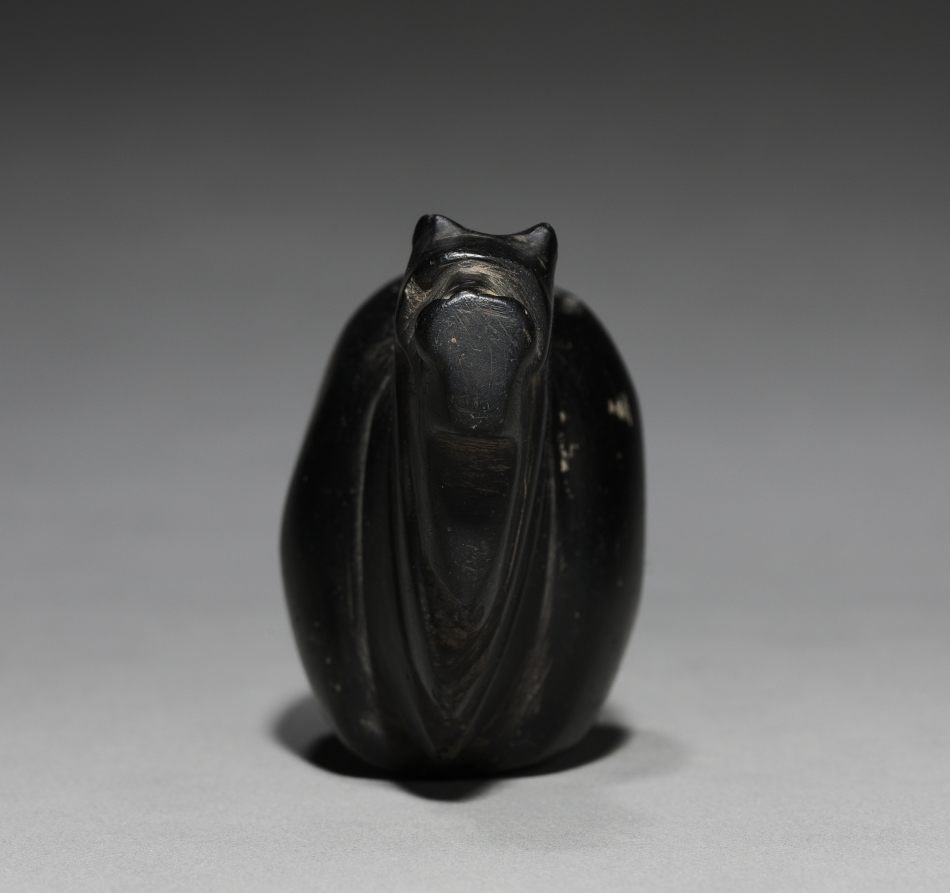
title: Alpaca Offering Container (Canopa)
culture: Peru, Inka style (1400-1532)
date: 1400–1532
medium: stone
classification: Stone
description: An unknown substance was placed in the back cavity of this alpaca before it was buried as an offering.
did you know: This stone llama was an offering buried to ensure health and fertility for domestic animals.